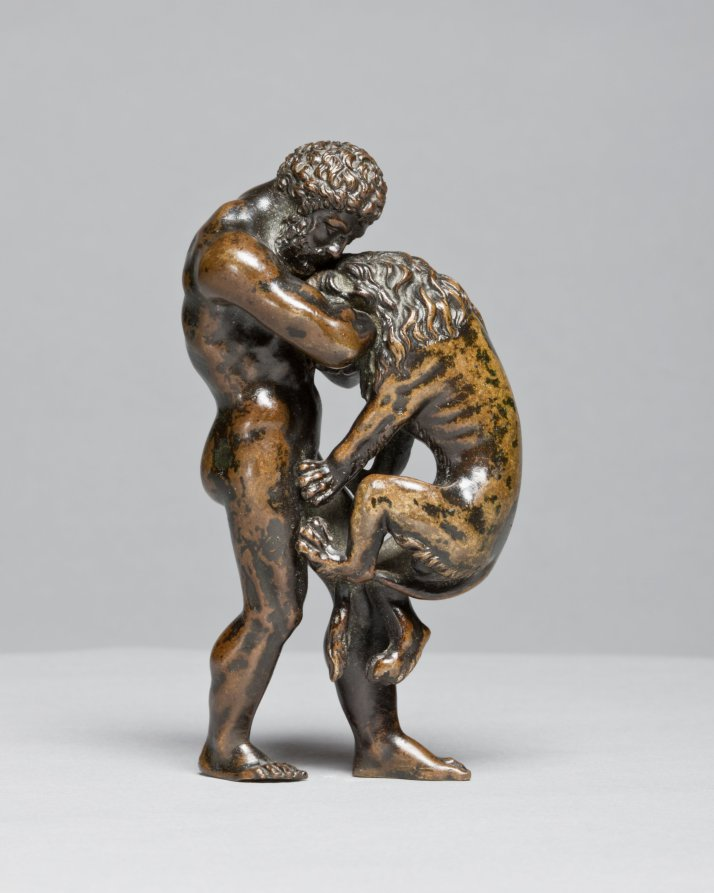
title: Hercules and the Nemean Lion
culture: Italy or France, 16th century or later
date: 1500s or later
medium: bronze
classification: Sculpture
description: The original owner of this work would have understood that this scene referred to the entire story of Hercules, the demi-god who had to accomplish twelve labors. The lion is named after the city of Nemea, near Corinth, a monstrous beast sent by the goddess Hera to wreak havoc on the area. After killing the lion, Hercules wore his pelt, commonly seen in other representations of the hero.